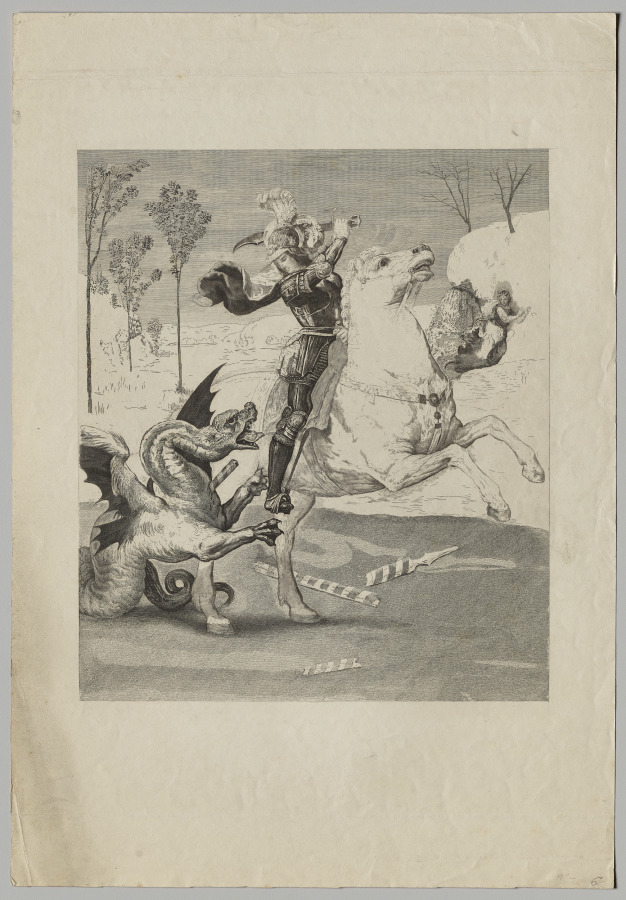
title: St. George and the Dragon (3)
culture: France, 19th century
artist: Claude-Ferdinand Gaillard (French, 1834–1887)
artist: after Raphael (Italian, 1483–1520)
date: 1885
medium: engraving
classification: Print